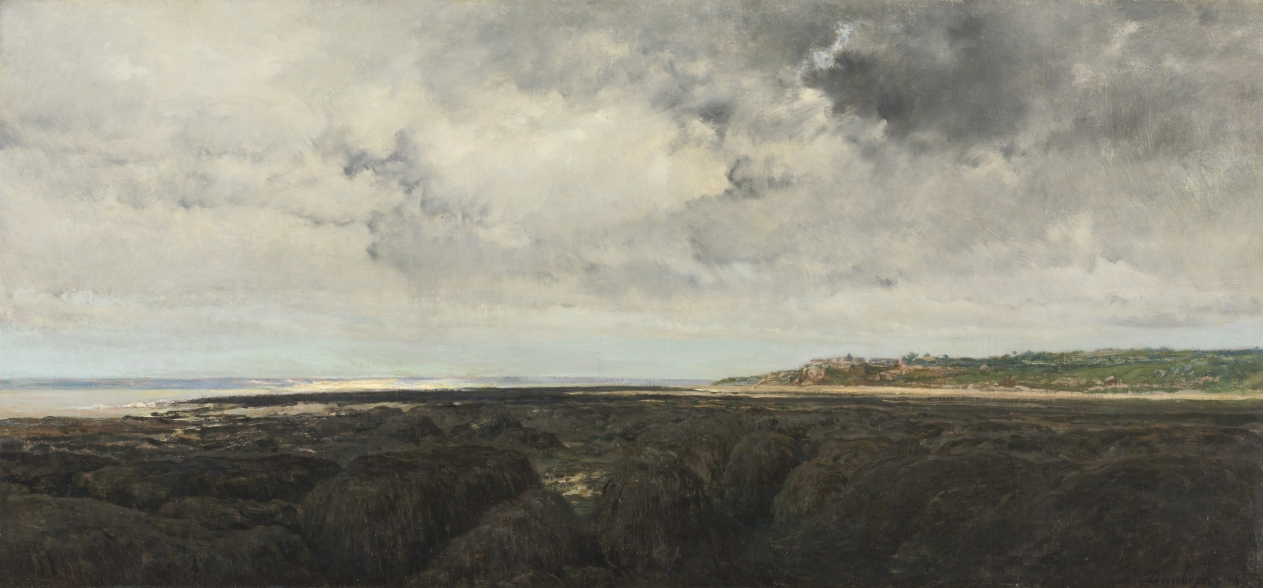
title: Villerville Seen from Le Ratier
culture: France, 19th century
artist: Charles François Daubigny (French, 1817–1878)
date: 1855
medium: oil on fabric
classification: Painting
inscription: Signed in lower right: Daubigny 1855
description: The town of Villerville on the Normandy coast appears just to the right of center in this expansive landscape by Daubigny, a pioneer of outdoor painting and a major influence on Claude Monet and the Impressionists. Daubigny introduced a new kind of natural landscape based on outdoor studies of light, water, and atmospheric conditions. Here, streaks of bright light along the horizon set off the dark masses of the rocky shore in the foreground.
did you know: Daubigny turned his boat, Le Botin (Little Box), into a studio where he painted while cruising the Seine, Marne, and Oise rivers in France.